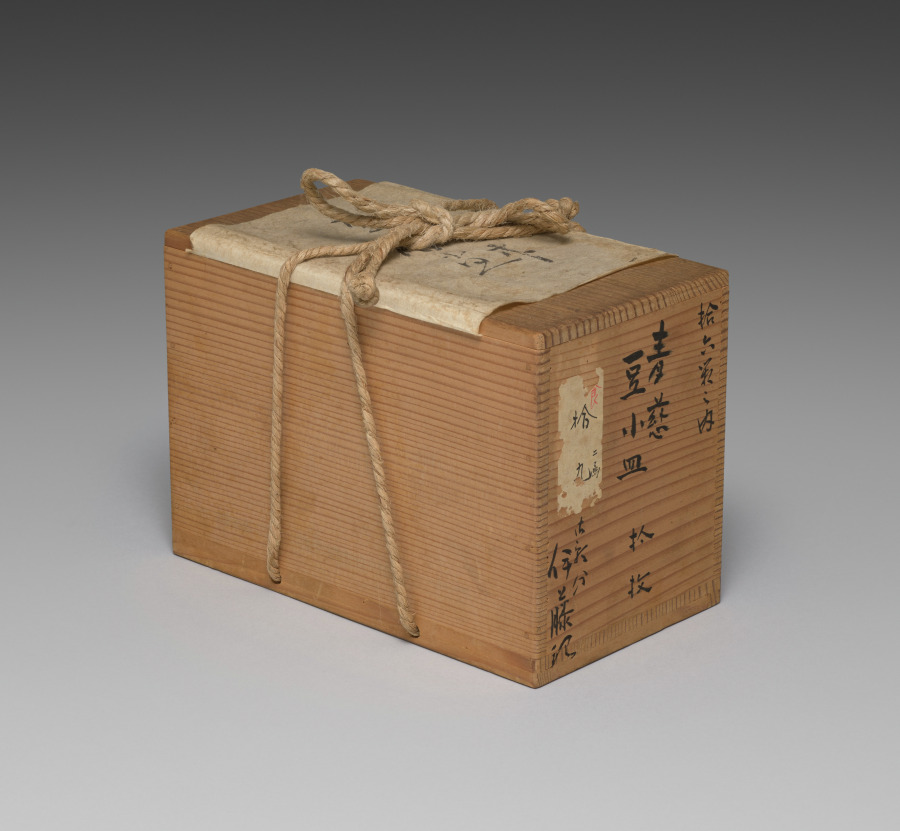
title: Saucers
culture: Japan, Meiji period (1868–1912)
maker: Seifū Yohei III (Japanese, 1851–1914)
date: 1893–1914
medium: Set of ten saucers; porcelain with green glaze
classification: Ceramic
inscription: 清風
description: Yohei III’s main output for his sophisticated clientele was in the form of tea sets and dining sets. He created a range of dishes in green glazes. He often produced in pairs, sets of five, or sets of ten. For this set of ten small dishes in a simple, round form that emphasizes the glaze above all, the box lid designates the piece as seiji, or green-glazed porcelain, using a general term for the extensive palette of green glazes often called celadon in English. The box lid further identifies the dishes themselves as tōchō, literally “bean-sized saucers,” a size that makes them suitable for dipping sauces.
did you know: The ten dishes in this set are stored in stacks of five in a two-compartment box.